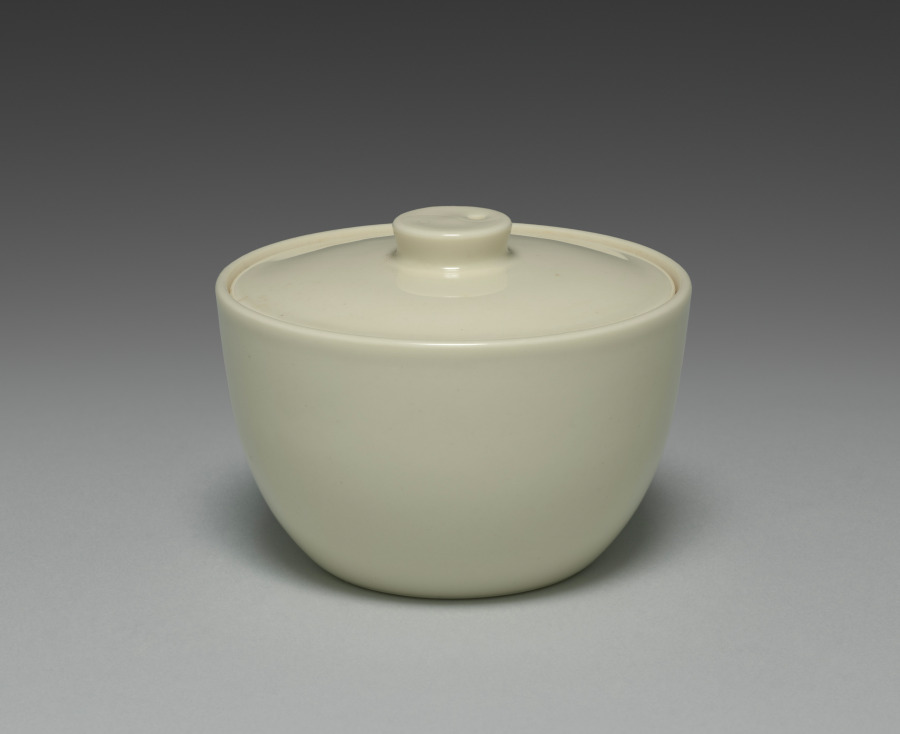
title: Hand-held Teapot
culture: Japan, Meiji period (1868–1912)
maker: Seifū Yohei III (Japanese, 1851–1914)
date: 1893–1914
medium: Porcelain with molded and carved design and cream glaze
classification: Ceramic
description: This teapot is of a variety used by advanced sencha practitioners. Called a hōhin, the pot is designed to be held directly by the fingers, with the body touching the upper part of the palm. This shape allows the host to manipulate the pot with a single hand and demonstrate dexterity. Direct contact between the ceramic body and the hand allows the host to closely gauge the temperature of the water within. There are differing grades of sencha, and for the finest one, gyokuro, the water temperature must be carefully regulated to achieve the proper flavor. This vessel is therefore efficacious for preparing this high-quality tea. The hōhin is also extremely portable, so it is well suited for impromptu gatherings. According to its box, this teapot is an example of taihakuji. “Great-white porcelain” was an important early invention Yohei III devised in 1972. It involved the combination of a distinctive translucent, creamy glaze over an ivory-colored clay body.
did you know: This pot’s restrained design includes on the lid’s handle a yin-yang motif, symbolizing the ideal balance between the forces of the universe.